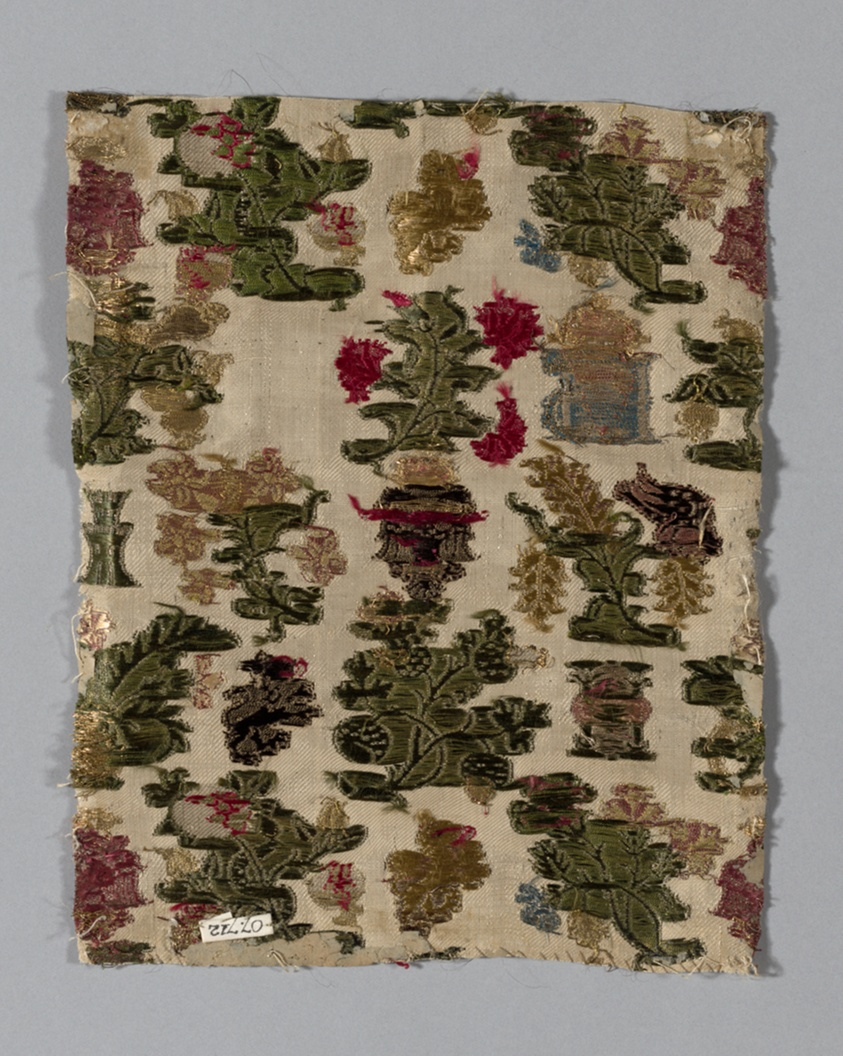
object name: Textile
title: Fragment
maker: Spain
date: 1601/25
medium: brocaded silk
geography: Spain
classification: textile; weaving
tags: lions, Monograms, crowns, eagles, birds, flowers